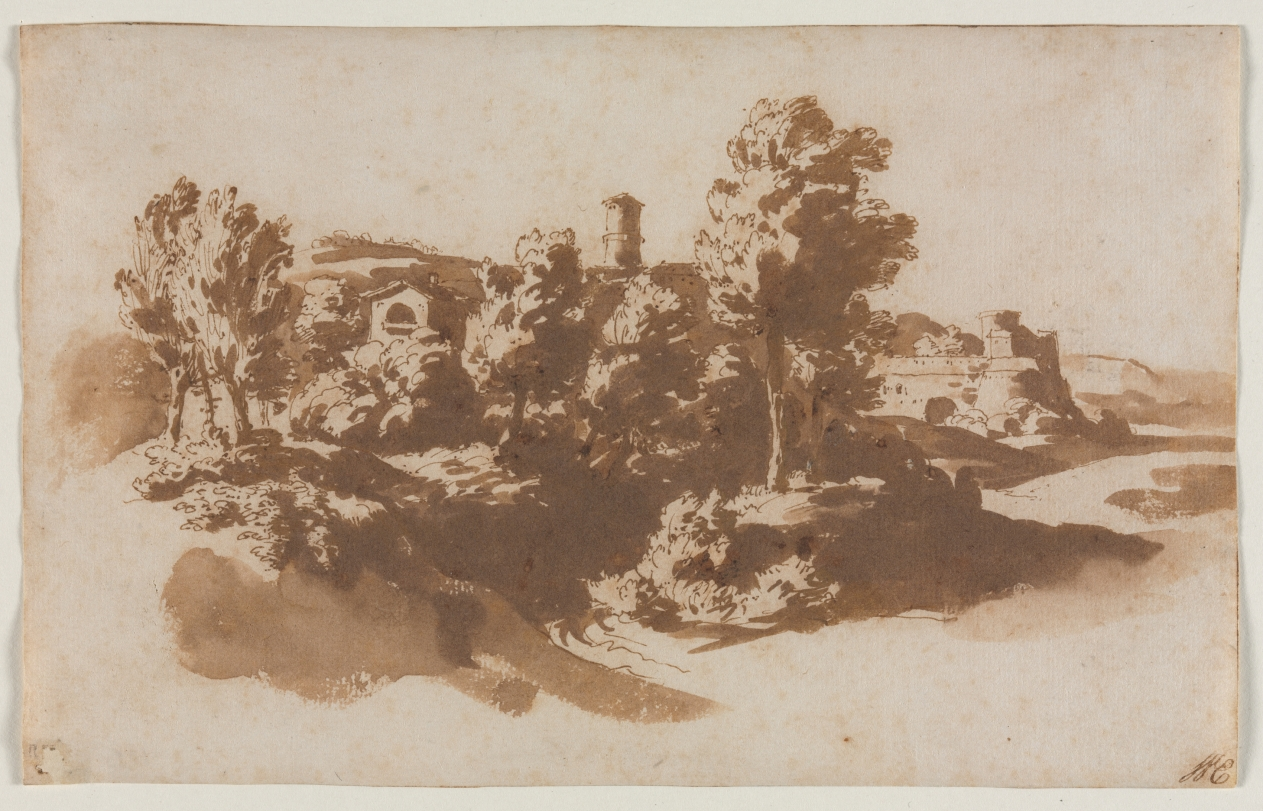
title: Landscape with Fortification Between Marino and Frascati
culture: Netherlands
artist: Jacob van der Ulft (Dutch, 1627–1689)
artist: or Gaspard Dughet (French, 1615–1675)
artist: possibly by Nicolas Poussin (French, 1594–1665)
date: c. 1650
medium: pen and brown ink and brush and brown wash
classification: Drawing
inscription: VERSO, [by artist?], upper left, in brown ink: Tússen marin en Frascati [=between Marino and Frascati] ; [by artist?], lower center, in brown ink: Tússen marin en Fr[ascani ?]. [=between Marino and Frascati?] ; [by artist?], lower right, in brown ink: 199. ; upper left, in red chalk: A ; upper right, in black chalk: Nº199 ; center, in graphite: [P?] (collector's mark?) ; lower left, in graphite: [cu ?] ; ON OLD SECONDARY SUPPORT (now removed): [P?] (collector's mark?)